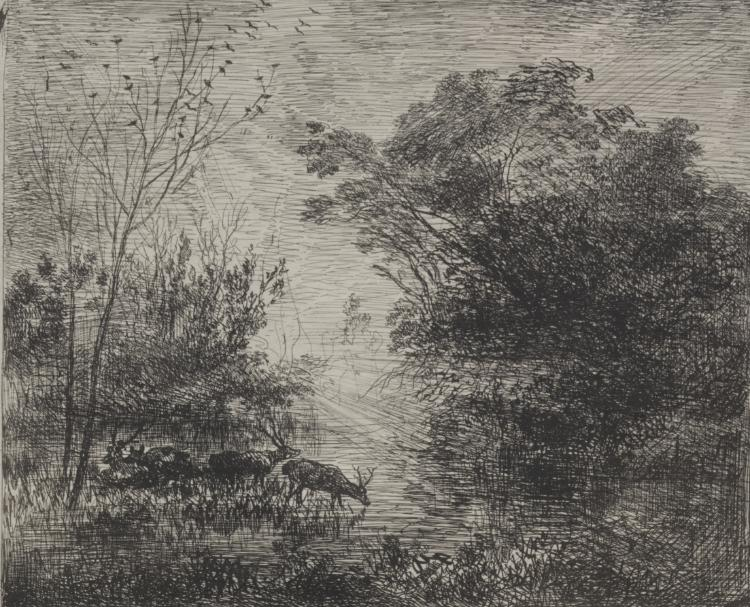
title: Stags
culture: France, 19th century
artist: Charles François Daubigny (French, 1817–1878)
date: 1862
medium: cliché-verre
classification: Print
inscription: lower right, in glass plate: Daubigny (in reverse)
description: Around 1853 a few artists and photography buffs who were searching for a photographic method of producing multiple prints developed the cliché-verre. A glass plate is coated with an opaque ground through which the design is drawn with a sharp instrument. The plate is then placed on top of a sheet of light-sensitive paper and exposed to light so that the image is reproduced on the paper.